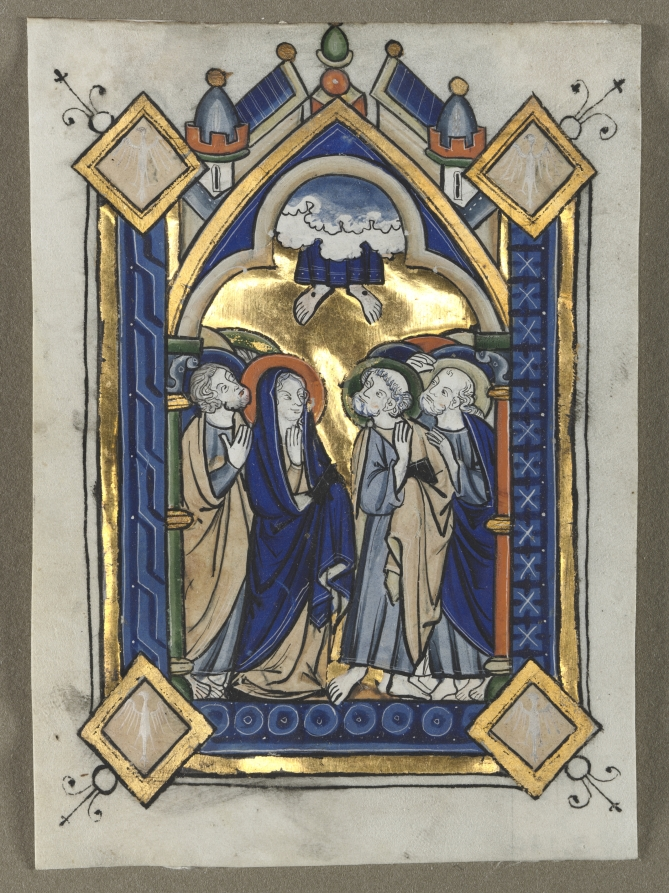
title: Leaf Excised from a Psalter: The Ascension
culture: Flanders, Liège(?), 13th century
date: c. 1260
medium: tempera and burnished gold on vellum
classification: Manuscript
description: Traditional locations within manuscript psalters were designated by decorated initials or, as is the case here, full-page miniatures. These locations marked the major divisions of the psalms as used in the daily office. The extraordinary quality of these miniatures suggests they once decorated a deluxe psalter made for a wealthy or aristocratic patron, possibly a cleric.